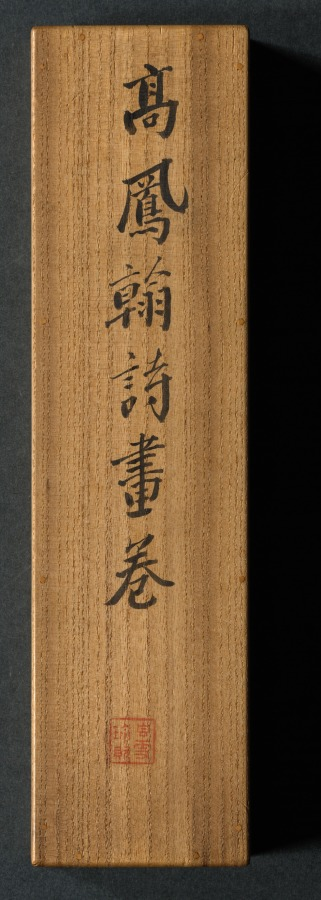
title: Plum Blossoms and Peonies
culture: China, Qing dynasty (1644-1911)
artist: Gao Fenghan (Chinese, 1683–1749)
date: 1741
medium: handscroll, ink on paper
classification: Painting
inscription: Artist's 2 inscriptions and 9 seals (the painting of Peonies with the artist's colophon and the colophon by Hou Chia-fan are on a single sheet of paper). Artist's inscription and 2 seals (Plum Blossoms): [seal] Ts'ai-yün. After finishing writing my colophon, I unrolled the painting to take another look, and it now seems that the composition here should have moved to the later part of the scroll. If that is the case, then the "Cool Beauty" [prunus] of the Solitary Hill is after all unable to take precedence over the "King of Flowers" [peony]. A laugh. Lao-fou inscribed. [seal] Feng-han. Artist's colophon (Plum Blossoms): [3 seals] Tun; Yen-yün-kung-yang, Hou-shang-tso-sheng. A few days after I painted this scroll for Shui- hsien [Yüeh Meng-yüan], the plum blossoms were in full bloom at his residence. He invited me over to enjoy them together for a long while, and I composed two additional poems and wrote them down here for his criticism. [Poems on the colophon are not translated.] First month, twenty-first day, your junior, Kao Feng-han of Nan-fou drafted this with the left hand. [seal] Feng-han. Artist's inscription and 4 seals (Peonies): Brushed with the left hand in the hsin-yu year [1741]. [seal] Yu-hsi. [3 seals at end of painting] Hou-shang-tso-sheng; Yen-yün-kung-yang; Shih-tsao-wu. Artist's colophon and seal (Peonies): The imperial concubine from the Yang family loved to dress in red, And from the emperor won the title of Hai-t'ang. But ever since she became the new dream of the moon palace, She changed into rainbow colors, while learning to dance. After I wrote the poem on Looking for Plum Blossoms in the Teng-wei Mountains, I attached to it a few branches of prunus, some bamboo tips and a piece of rock, with a scattering of green [moss] here and there to fill up the scroll. Unexpectedly, my playful fascination [with these subjects] was still not quite satisfied, so I made up these amorous ideas and romantic images [of the peony], to follow the footsteps of the fair lady of the Ku-hsieh Mountain [prunus]. Furthermore, I picked out one poem to be my vanguard. Perhaps such luminosity of wealth and power will be enough to overwhelm the poor fellows, and [they] will not mind the comparatively short length [of paper] assigned to it. Amusingly inscribed. Please correct me again. To Shui-hsien, my learned senior, your junior Han inscribed again. [seal] Tso-hua [left-handed painting]. 1 additional colophon and 5 additional seals: 1 colophon, dated 1742, and 3 seals of Hou Chia-fan (act. ca. 1742); 1 seal of P'u Ch'üan (20th c.?); 1 seal of Li family (dates unknown).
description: One of the so-called Yangzhou Eccentrics (a group of painters who lived in Yangzhou and were known for their unorthodox art and lifestyle), Gao Fenghan depicts China’s two most loved flowers in full bloom—the “cold beauty,” or plum blossom, in the first section, and the “king of flowers,” or peony, in the second section. Painted in 1741, the year when Gao decided to leave the south and return home to Shandong province in eastern China, this work was likely a token of farewell. His casual brushwork may indicate his mental and physical struggle at the time. After having crippled his right hand in 1737, Gao used his left hand to paint and achieved a crudeness and eccentric style unattainable before.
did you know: In East Asian art, peonies traditionally symbolize prosperity and wealth.